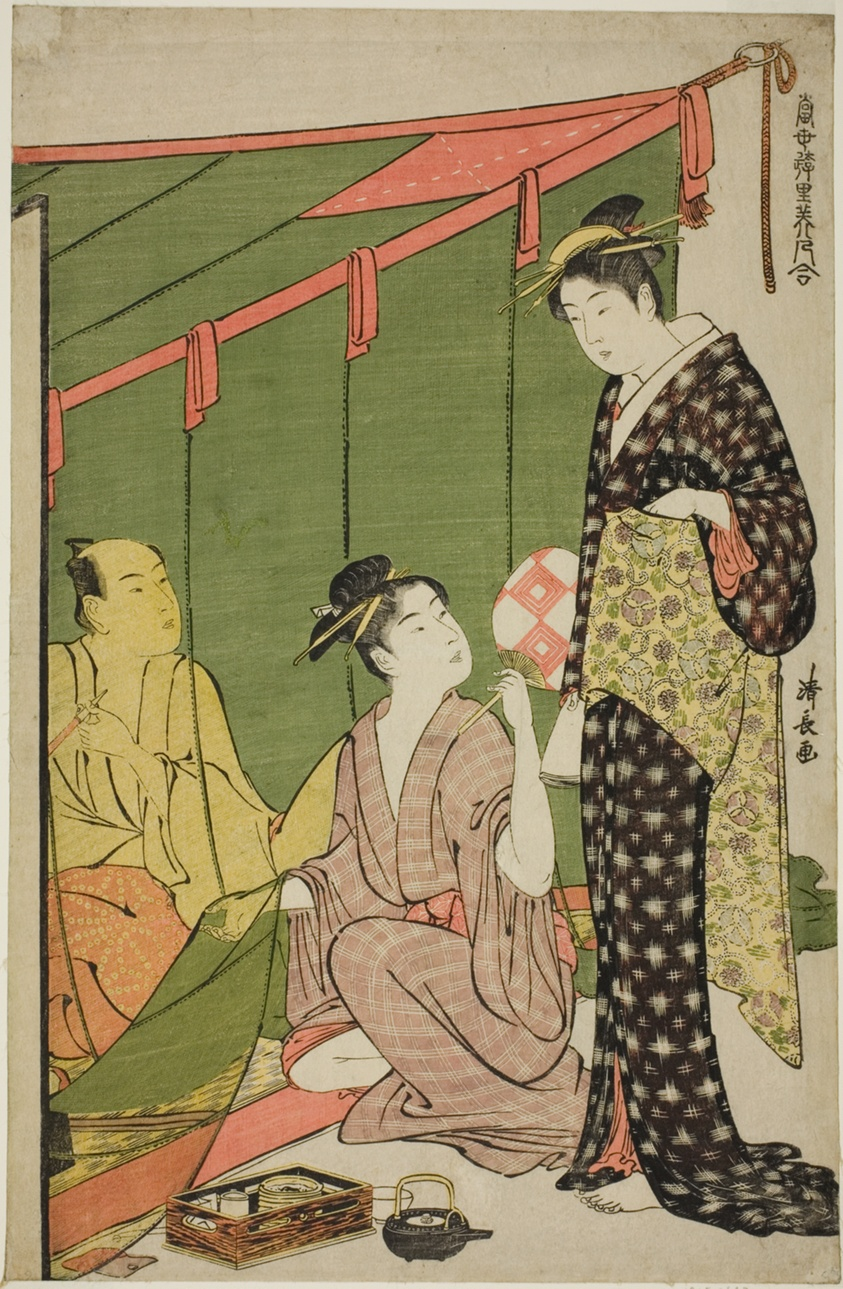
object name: Print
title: Mosquito Net, from the series "A Collection of Contemporary Beauties of the Pleasure Quarters (Tosei yuri bijin awase)"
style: Japanese (culture or style)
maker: Torii Kiyonaga (Japanese, 1752-1815)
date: c. 1784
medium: Color woodblock print; oban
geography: Japan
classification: woodblock print; print; asian art